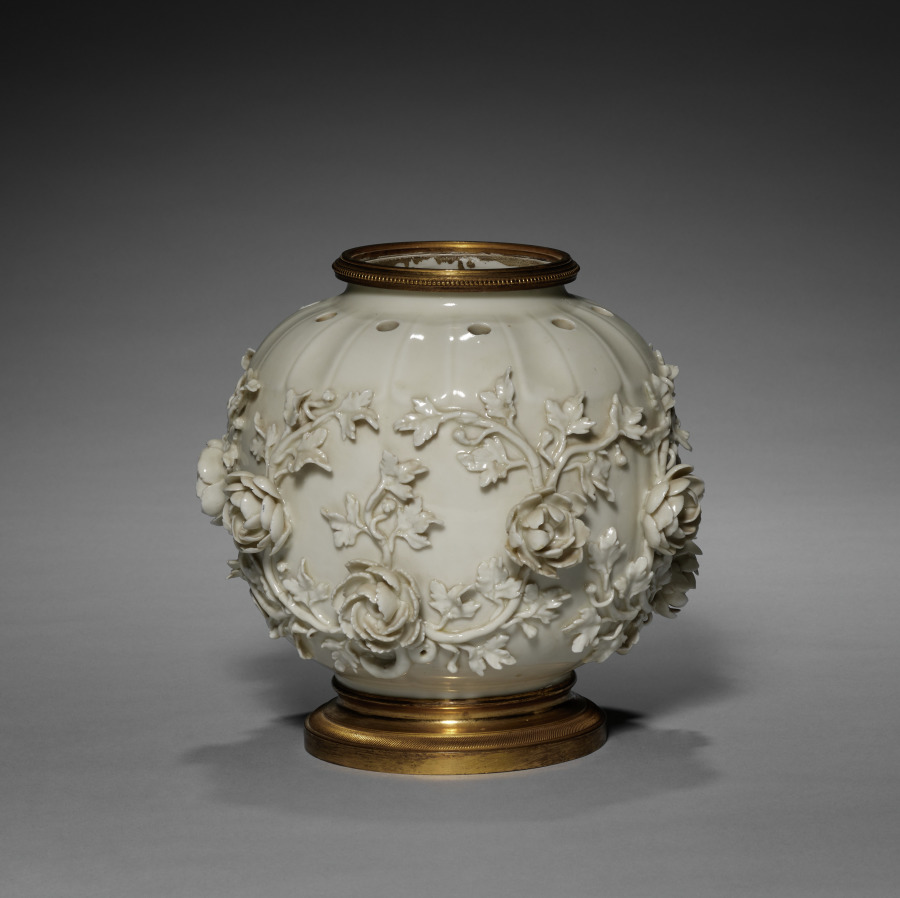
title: Potpourri Vase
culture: France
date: 1860–80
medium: blanc-de-chine porcelain; gilt bronze mount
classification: Ceramic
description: This vase--part of a pair of covered vases--was created to contain potpourri, a mixture of flowers, herbs, and spices emitting ambient fragrance. This specific function offered a particularly fertile ground for the development of French porcelain from the mid-1700s, as manufactories experimented with forms, surface ornamentations, and placement of perforations. Produced by the firm of Edmé Samson in the 1800s, the vases pay homage to this history. While using updated technique and material, as well as more exuberant decorations, these vases draw upon designs by earlier innovators such as the Saint-Cloud manufactory.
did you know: Potpourri vases always have holes in the top to let the scent of dried spices and flowers contained within freshen the air around them.